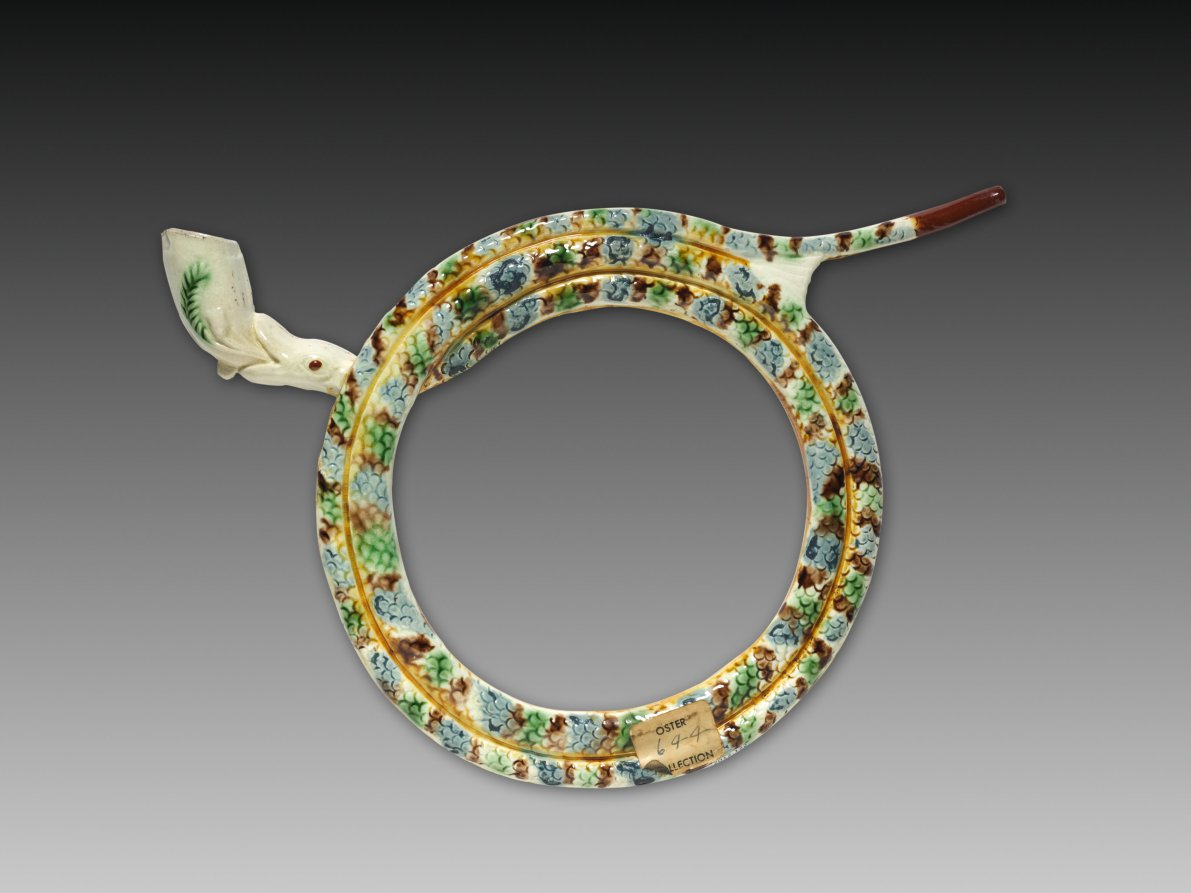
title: Pipe in the Form of Coiled Snake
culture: England, Staffordshire, late 18th-early 19th Century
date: 1780–1820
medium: lead-glazed earthenware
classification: Ceramic